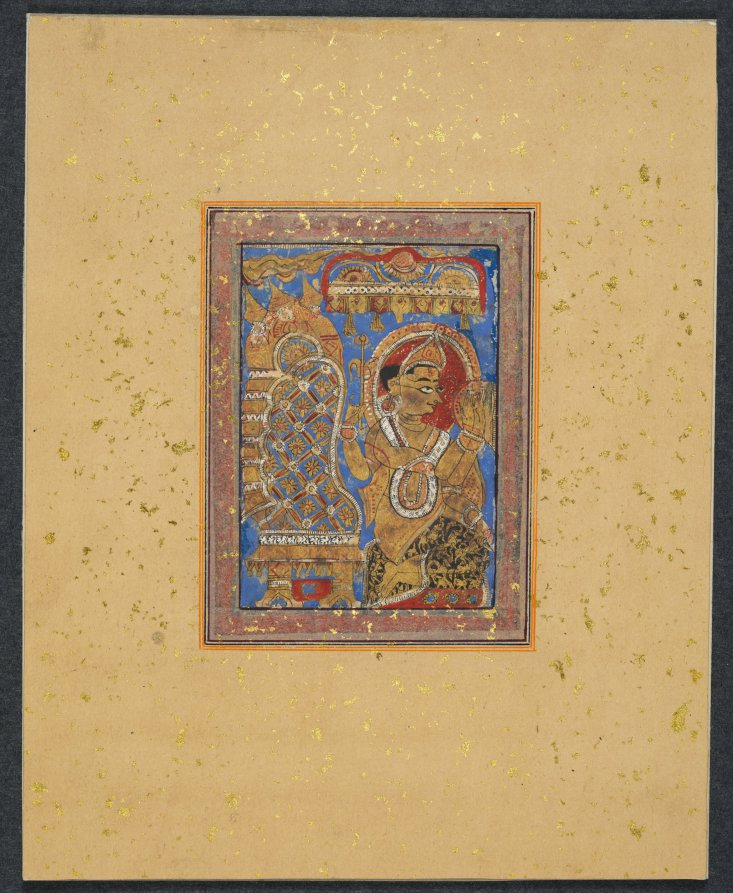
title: Painting from a Kalpa-sutra: Indra Praises the Embryo of Mahavira in the Womb of the Brahman Woman Devananda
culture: Western India, Gujarat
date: c. 1450–75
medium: Gum tempera and gold on paper; 18th century gold flecked paper border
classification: Painting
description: Until recently, and especially during the 1800s and early 1900s, the paintings in South Asian manuscripts were excised and mounted as individual works of art. These two paintings from a Jain manuscript of the Kalpa-sutra have been separated from the text and mounted with gold-flecked borders, like pictures in an album.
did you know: The four-armed king of the gods, Indra, got off his throne to kneel in praise of the conception of the 24th Jina Mahavira.